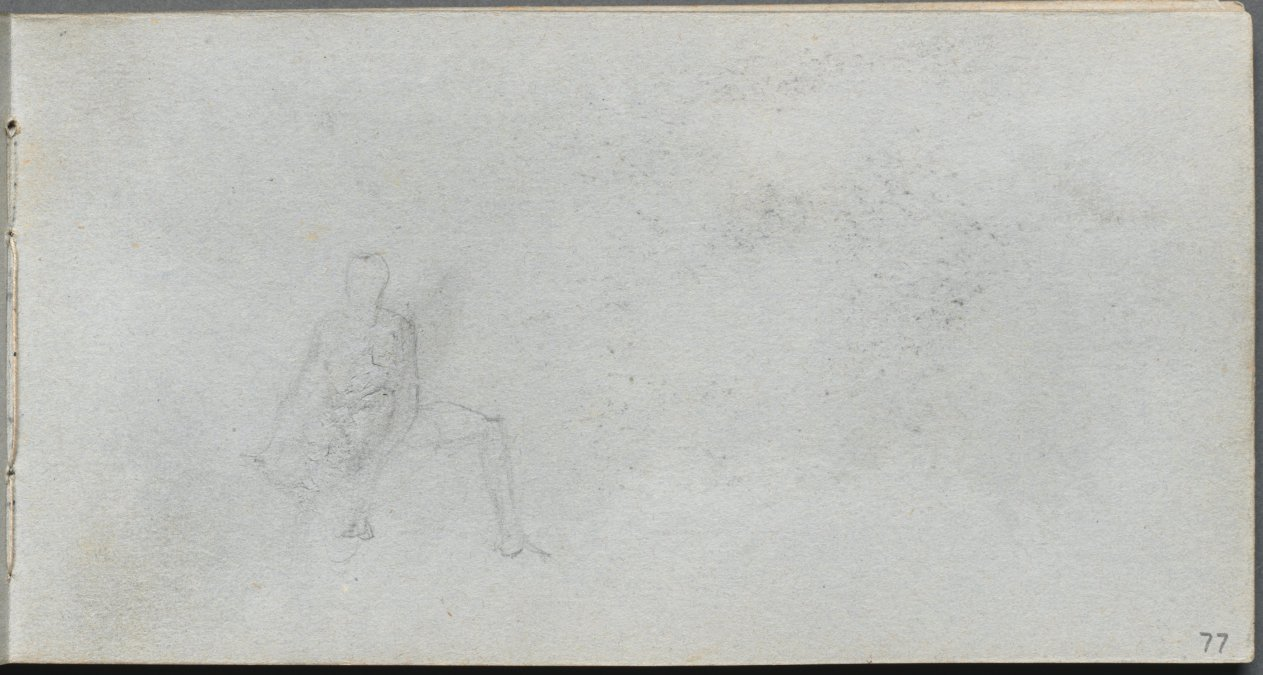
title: Sketchbook, page 77: Figure Study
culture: France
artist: Ernest Meissonier (French, 1815–1891)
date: c. 1860s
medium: graphite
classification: Bound Volume